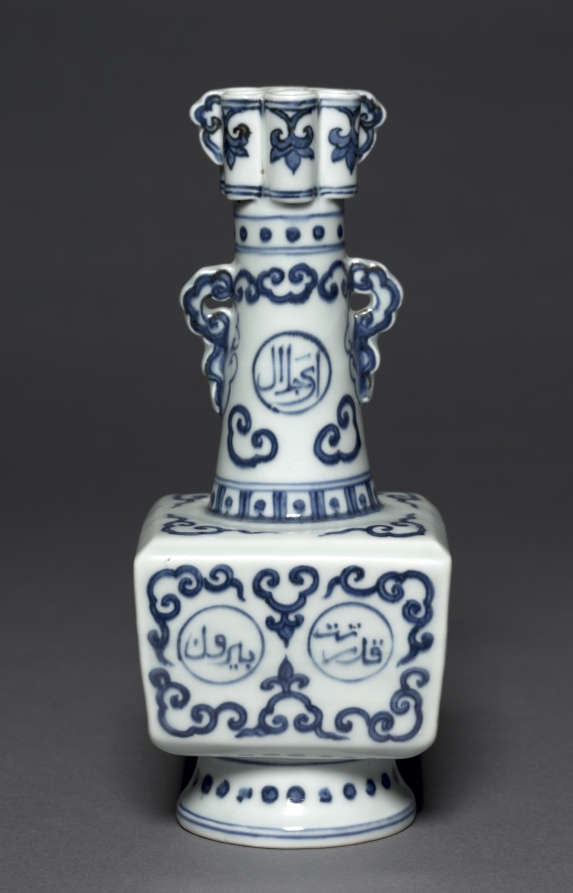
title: Arrow Vase with Persian Inscriptions and Floral Scrolls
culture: China, Jiangxi province, Jingdezhen kilns, Ming dynasty (1368-1644), Zhengde mark and reign (1505-1521)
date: 1506–21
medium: porcelain with underglaze cobalt blue decoration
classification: Ceramic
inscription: The two Persian inscriptions on the neck freely translated read 'Oh Beautiful! Oh Powerful'! Those around the body read 'None knows the extent and limits of Thy power and Majesty.'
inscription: 大明正德年製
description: Chinese potters in the 1500s integrated foreign motifs, shapes, and ideas in order to cater to changing tastes and new customers in an increasingly global world.